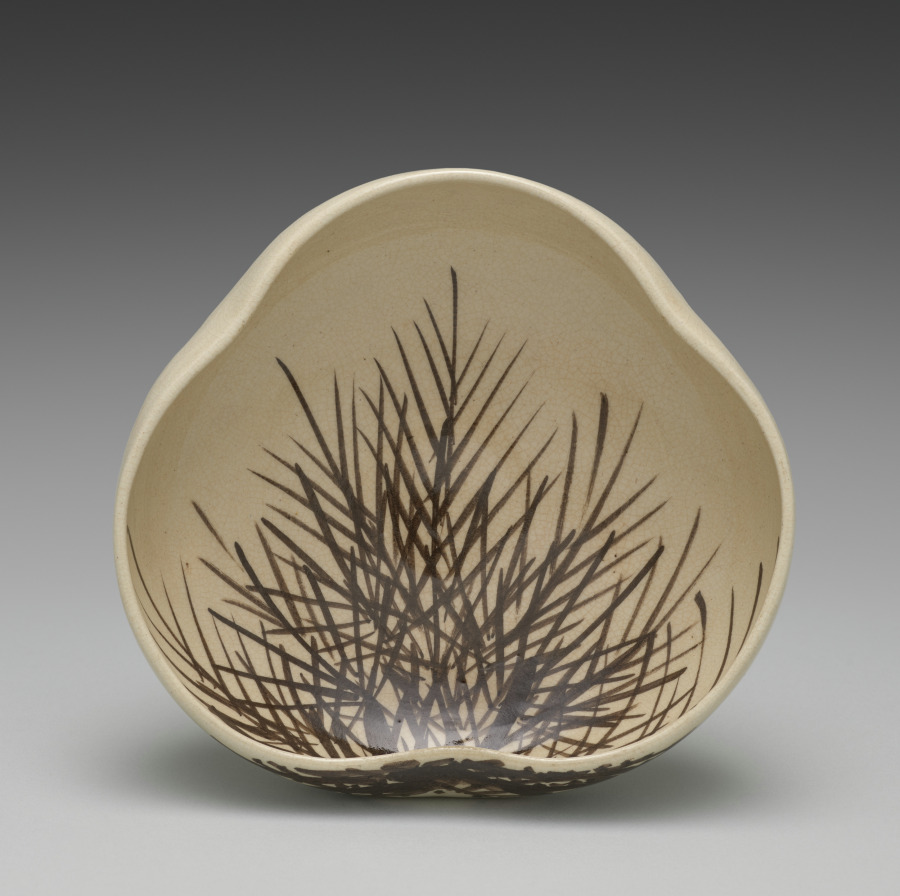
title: Pine-shaped Dish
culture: Japan, Meiji period (1868–1912)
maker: Seifū Yohei III (Japanese, 1851–1914)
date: 1893–1914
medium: Stoneware with underglaze iron oxide and crackled glaze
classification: Ceramic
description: The clever design on this stoneware Awata-style dish makes use of the interior and exterior surfaces to present a close-up view of pine needles on the branch painted in underglaze iron oxide. The branch is shown on the outside of one side of the dish, while the needles fan out across the inside. The entire dish, when seen from above, reveals a shape resembling the mushroom cap–like motif appearing in textile designs and in classical Japanese paintings called Yamato-e to represent pine trees.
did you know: Awata ware, named for the area of Kyoto where it was historically produced, is considered a subset of Kyoto ware. It is characterized by a very light brown body with a transparent crackled glaze.